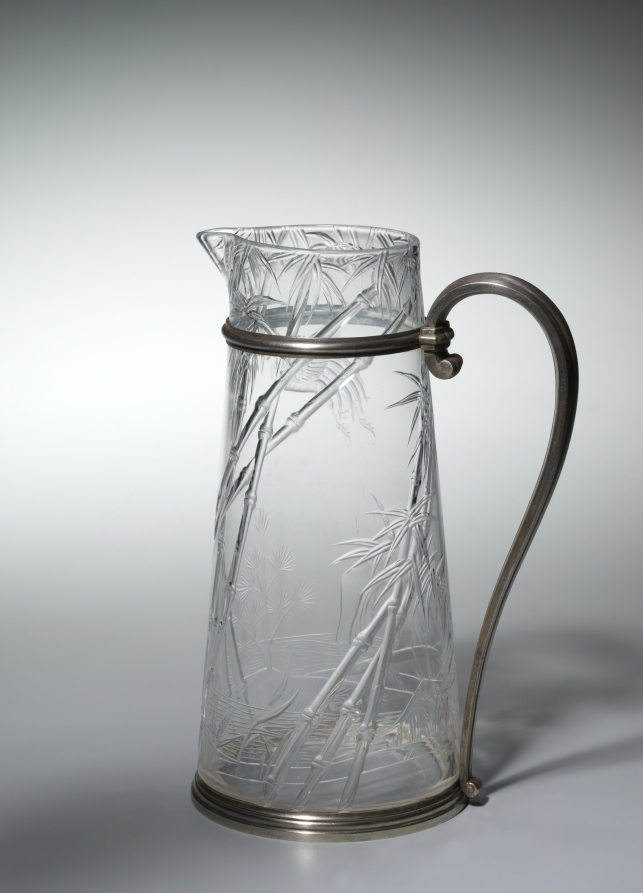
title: Pitcher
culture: France, 19th century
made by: Baccarat glasshouse (French)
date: c. 1880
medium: glass with metal mounts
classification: Glass